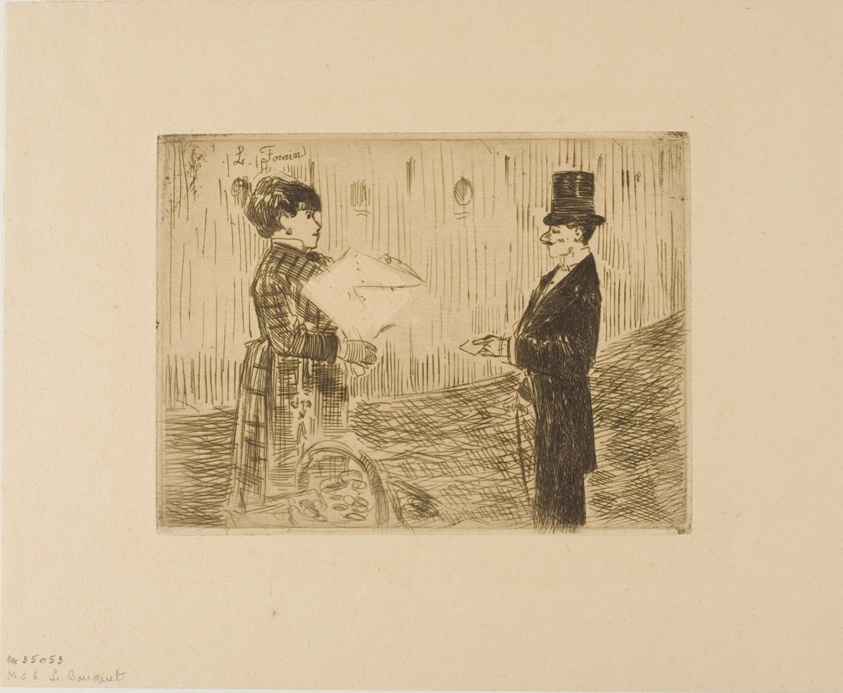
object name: Print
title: The Bouquet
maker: Jean Louis Forain (French, 1852-1931)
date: c. 1876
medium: Etching on buff wove paper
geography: France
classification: etching; print; prints and drawing